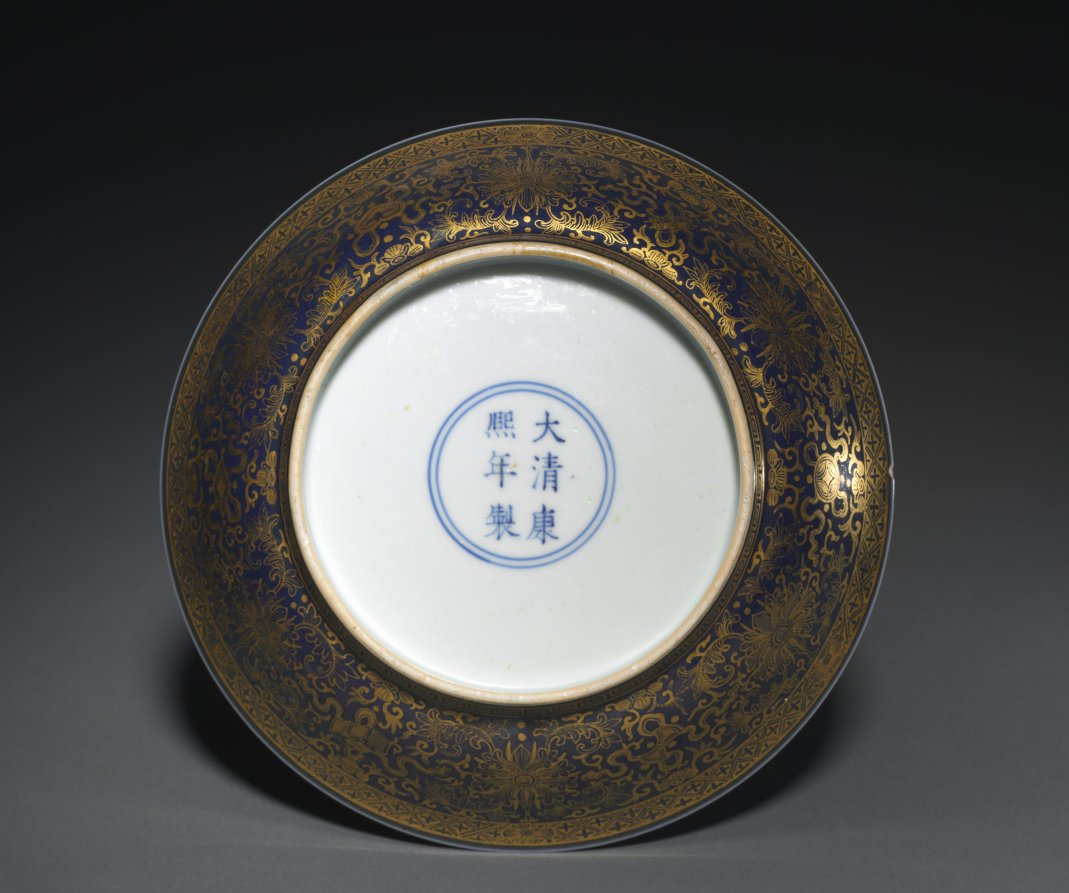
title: Dish with Zhang Guolao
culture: China, Jiangxi province, Jingdezhen kilns, Qing dynasty (1644-1911), Kangxi reign (1662-1722)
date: 1662–1722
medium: porcelain with famille verte overglaze enamel and painted gold decoration (interior) and powder blue glaze with painted decoration (exterior)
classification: Ceramic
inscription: 大清康熙年製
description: Zhang Guolao, featured on this dish, is one of the Eight Immortals and a gifted magician who was believed to know the secret arts to obtain longevity. Typically depicted as an old man and accompanied by his mule, he is the patron saint of artists. His mule is said to be magical; it can be folded up like a piece of paper to fit into a small bag. The central scene is framed by a sumptuously gold-decorated rim showing spaces reserved for landscape scenes in primarily fresh blue and green colors.